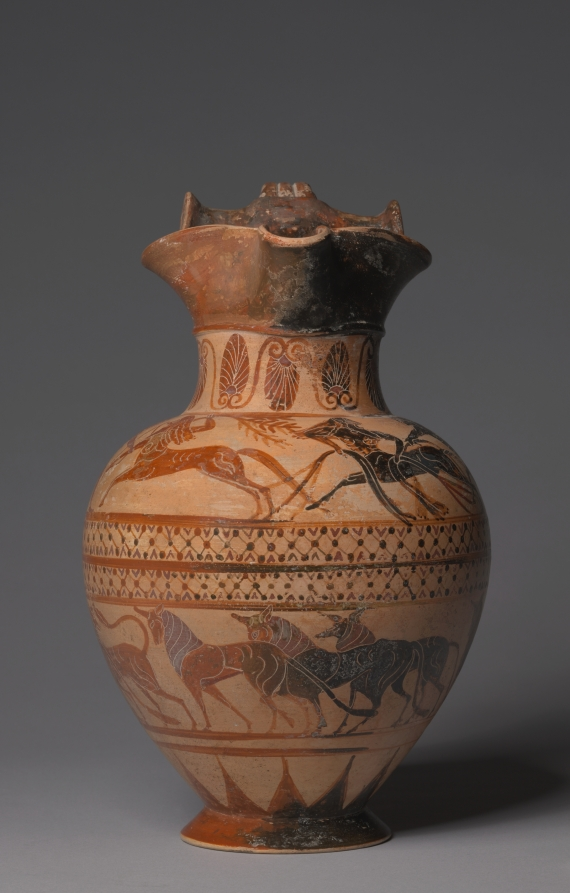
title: Black-Figure Oinochoe (Wine Jug): Hercle (Herakles) and Pholos; Cattle (of Geryon?)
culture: Etruscan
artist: attributed to Tityos Painter (Etruscan, active at Vulci c. 530–510 BCE)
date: c. 520 BCE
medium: ceramic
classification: Ceramic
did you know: This oinochoe or wine pitcher is a type of pottery made by the Etruscans or pre-Italic peoples.